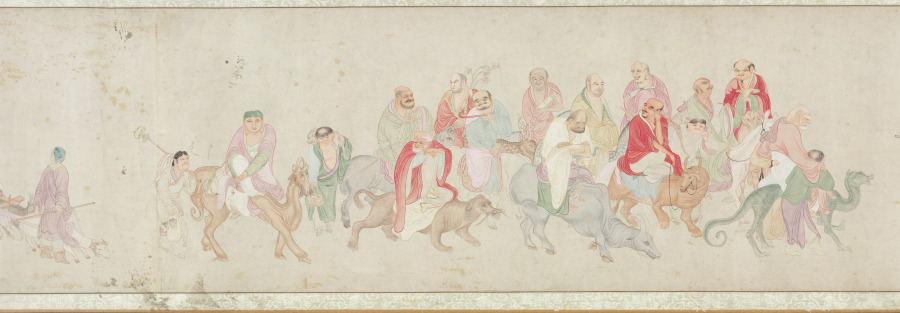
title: The Five Hundred Arhats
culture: China, Ming dynasty (1368–1644)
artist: Wu Bin (Chinese, active c. 1591–1626)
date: 1591–1626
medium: Handscroll; ink and color on paper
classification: Painting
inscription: 枝隱頭陀吳彬齋心拜寫 [印]吳彬之印; 文中父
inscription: 7 seals of Qianlong emperor (r. 1736–95): Gu xi tian zi 古希天子; Shou 壽; Qianlong jian shang 乾隆鑑賞; San xi tang jing jian xi 三希堂精鑑璽; Yi zi sun 宜子孫; Tai shang huang di zhi bao 太上皇帝之寳; Qian qing gong bao 乾清宮寶.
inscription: 6 seals of Cheng Qi 程琦 (1911–1988): Ke an geng zi wu shi yi hou suo de ming ji 可菴庚子五十以後所得名跡; 5 other Cheng Qi seals.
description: More than 66 feet long, this handscroll depicts 447 luohans, 72 attendants, and the bodhisattva of compassion at its very end. Luohans (arhats in Sanskrit), disciples of the Buddha and protectors of the Buddha’s law, possess supernatural powers and take on myriad external appearances. The amusing assortment of characters are engaged in an array of religious, secular, and miraculous activities. The painter used stylistic features borrowed from earlier artists, carefully controlled lines, and refined coloring. Wu Bin was a lay Buddhist and depicting this sort of image was part of a religious practice seeking understanding of the Buddha’s teaching.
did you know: Far advanced on the path to enlightenment, arhats have the capacity to tame tigers, free dragons, and to float on water or in the air.